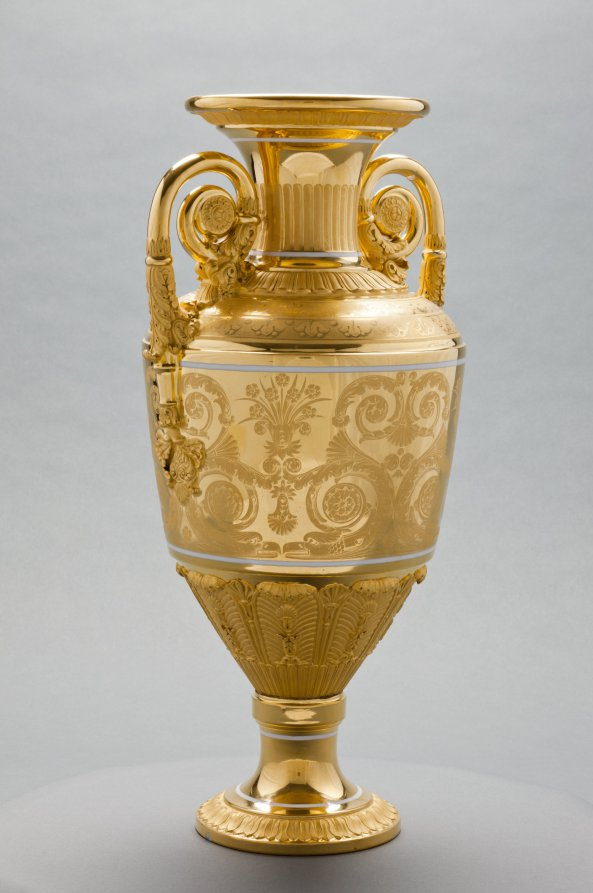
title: Vase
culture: Russia, St. Petersburg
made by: St. Petersburg Imperial Porcelain Factory (Russian)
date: c. 1820–1830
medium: gilt porcelain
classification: Ceramic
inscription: inscribed: "Moreau" in gold near lip.